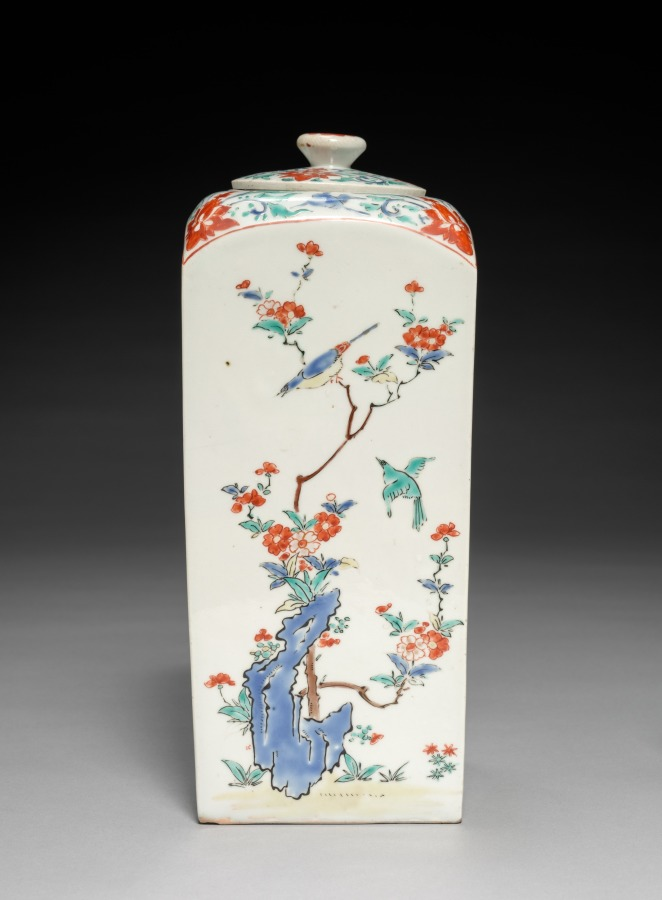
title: Square Jar with Birds and Flowers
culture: Japan, Edo period (1615–1868)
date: late 1600s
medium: Porcelain with overglaze color enamels and gold (Hizen ware, Kakiemon type)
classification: Ceramic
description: This lidded square jar was likely paired with a complementary yet nonidentical mate. The pine tree, plum, and bamboo together form the frequently depicted motif known as the Three Friends of Winter (shōchikubai), so named because of their hardy perseverance in the cold. Each side also features a pair of birds, including cranes on one face and pheasants on another.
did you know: A jar like this was fired at a high temperature, painted with colored enamels, and then fired again at a lower temperature.